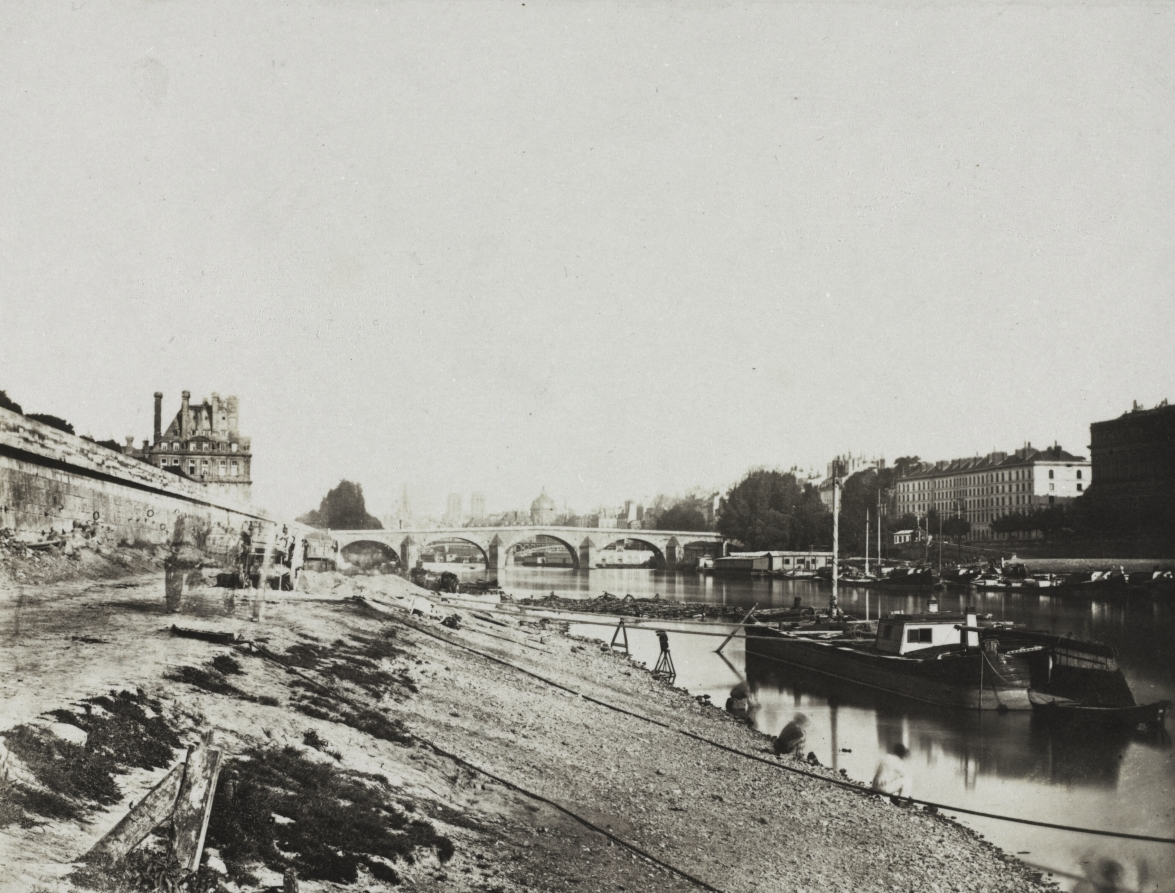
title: View from the Pont de la Concorde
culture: France, 19th century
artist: Charles Henri Plaut (French)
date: 1852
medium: fonteny salt print from wet collodion negative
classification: Photograph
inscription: Printed on mount on recto: "Paris. Photographié. Pl. 13./ Plaut fecit 1852 /VUE PRISE AU BAS DU PONT DE LA CONCORDE /Publié par GOUPIL & Cie, Editeurs,/ Paris, London, Berlin, New York" "Impr. Photographique de H. De FONTENY,/ Rue St. Nicholas d'Antin, 72 Paris." Written in pencil on recto: "Plaut / M22345"